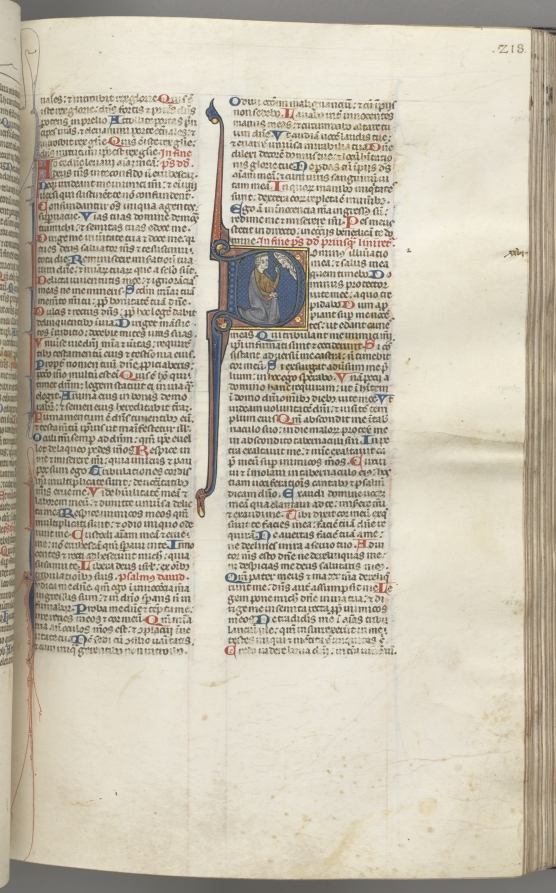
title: Fol. 218r, Psalm 26, historiated initial D, David kneeling pointing to his eyes, the bust of God above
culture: Southern France, Toulouse(?), 13th century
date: c. 1275–1300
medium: ink, tempera and gold on vellum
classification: Bound Volume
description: Biblical manuscripts were highly prized and important possessions of churches, monasteries, cathedral schools, and universities throughout medieval Europe. The biblical texts were known as the vulgate, the translations made by Saint Jerome in the fourth century from Hebrew and Greek into Latin, which became the definitive and official Latin version of the Roman Church. In the 13th century, the bible was, for the first time, produced as a single volume with an officially sanctioned sequence to its books and chapters as illustrated by this example. The very extensive decoration of this bible is arranged hierarchically to indicate the relative importance of the various texts so that full or almost full-page initials mark the openings of the first prologue, Genesis, and the first Gospel; historiated initials mark the beginning of each book and illuminated initials mark the Prologues.